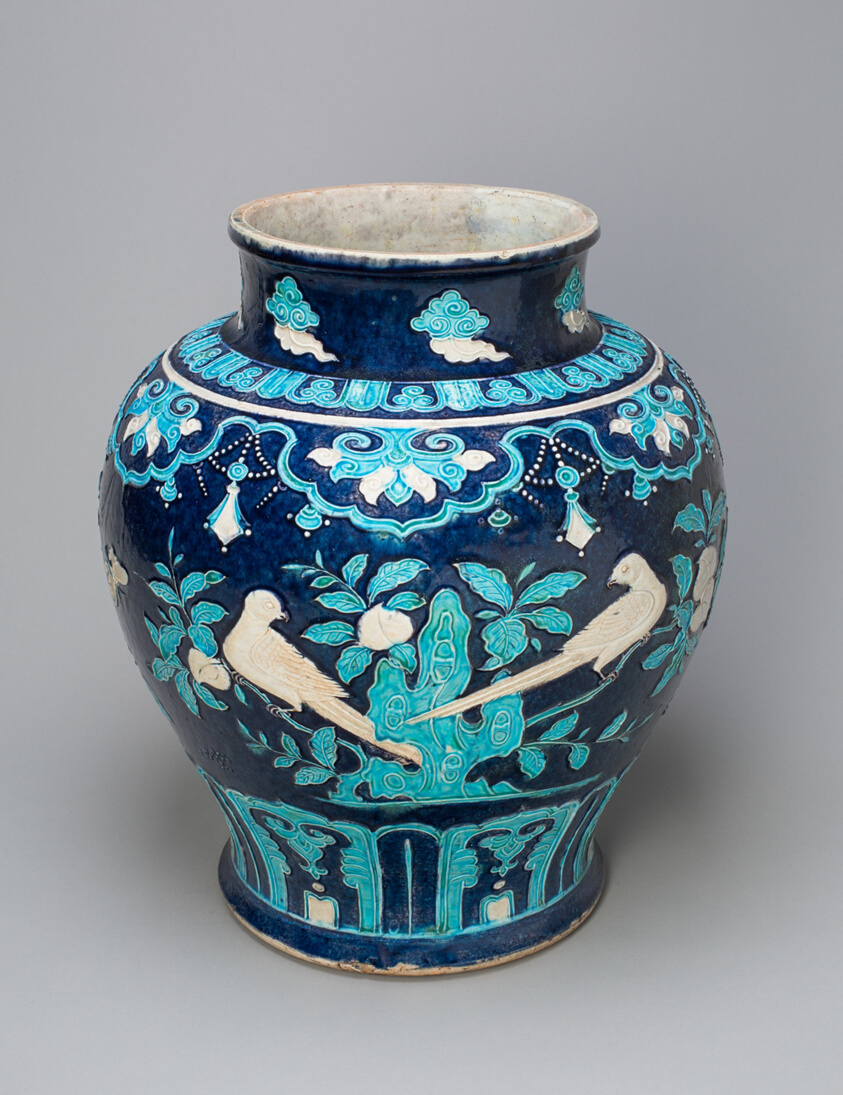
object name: Vessel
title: Jar with Birds and Butterflies on Flowering Branches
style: Chinese (culture or style)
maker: China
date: Ming dynasty (1368–1644)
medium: Fahua ware; porcelain with biscuit outlines and underglaze molded decoration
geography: China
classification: porcelain; asian art; ceramics; vessel